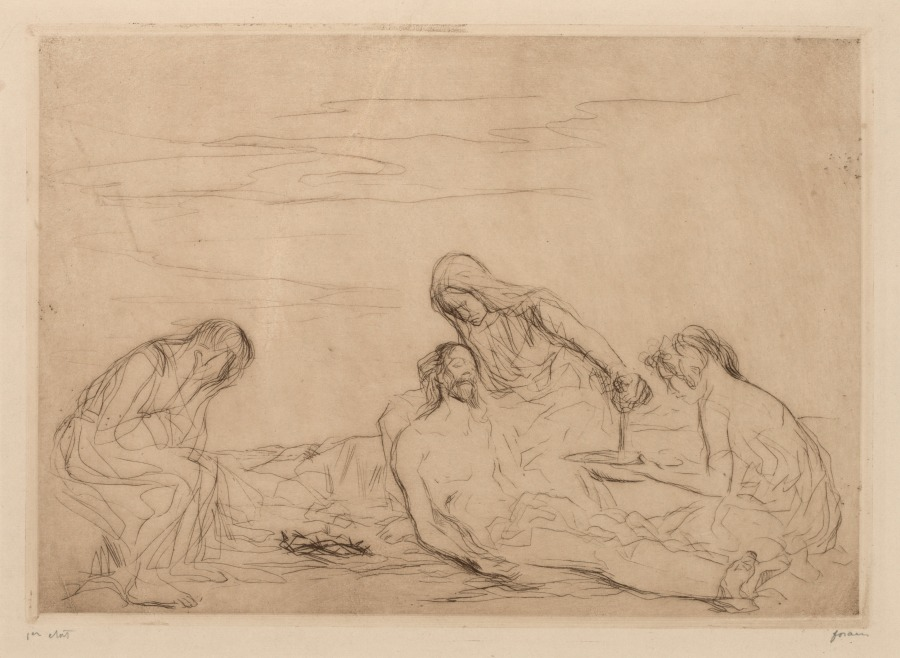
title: Pietà (third plate)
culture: France, 19th-20th century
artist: Jean Louis Forain (French, 1852–1931)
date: 1910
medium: etching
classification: Print